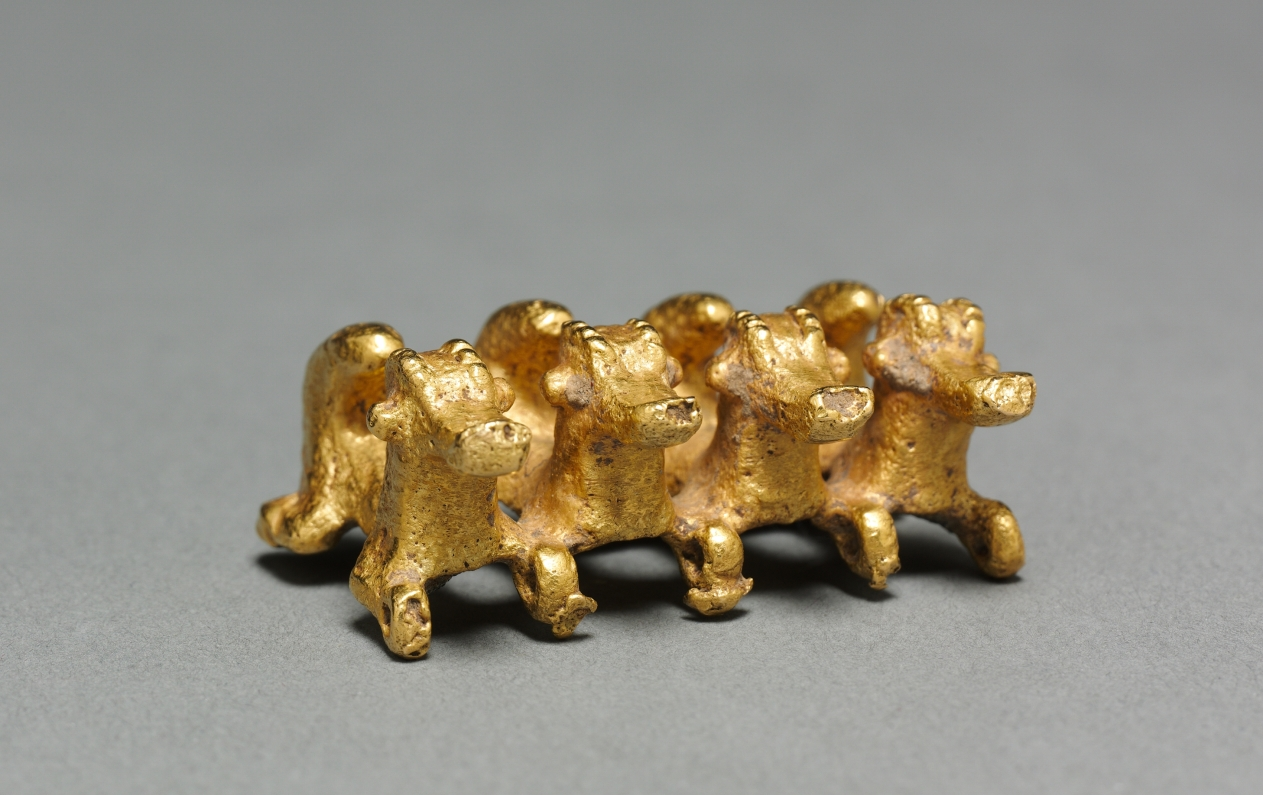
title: Curly-Tailed Animal Pendant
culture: Panama, Initial style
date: 100–800 CE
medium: gold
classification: Metalwork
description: A favored Initial-style subject is a charming animal whose curly tail -- its most impressive feature -- may derive from a monkey’s. Its other traits vary considerably, causing it to be identified as everything from a dog to a duck. Initial-style gold ornaments represent Panama’s oldest metalwork. Since metal technologies appeared suddenly and fully developed in Panama, it is likely that they were introduced from the outside, probably from Colombia to the south.